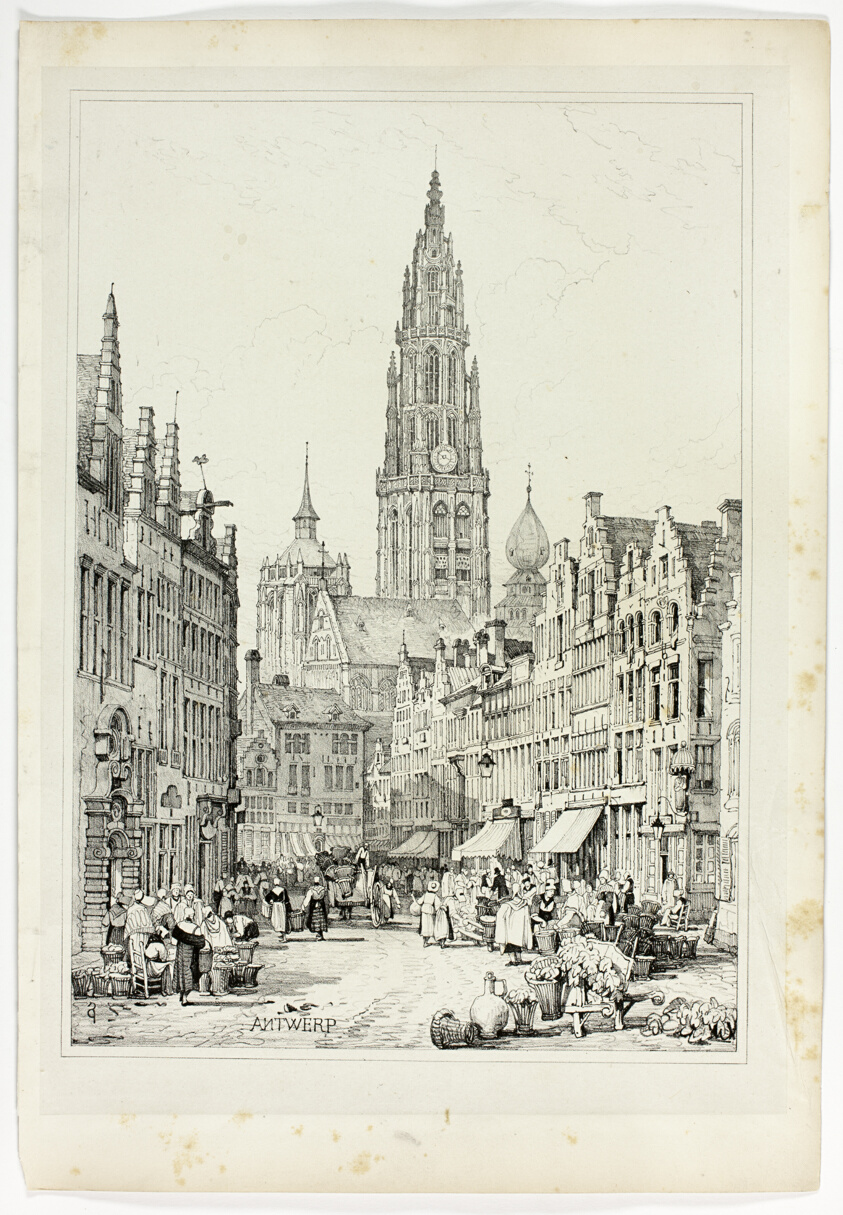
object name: Print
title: Antwerp, from Facsimiles of Sketches made in Flanders and Germany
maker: Samuel Prout (English, 1783-1852); printed by Charles Joseph Hullmandel (English, 1789-1850)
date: 1833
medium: Lithograph in black on grayish-ivory chine, laid down on ivory wove paper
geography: England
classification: lithograph; print; prints and drawing